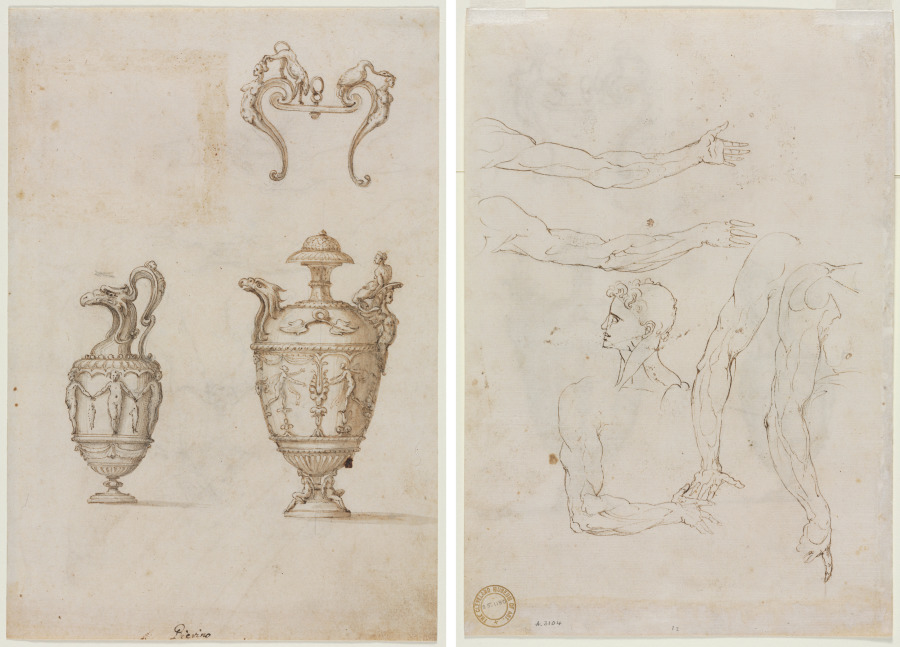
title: Design for Two Vases and an Ornament (recto); Sketches of Five Arms and a Head (verso)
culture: Italy, 16th century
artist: Luzio Romano (Italian, active 1528–75)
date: mid 1500s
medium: pen and brown ink and brush and brown wash, with brush and gray wash (left vase), over black chalk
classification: Drawing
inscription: lower center, in brown ink: Pierino